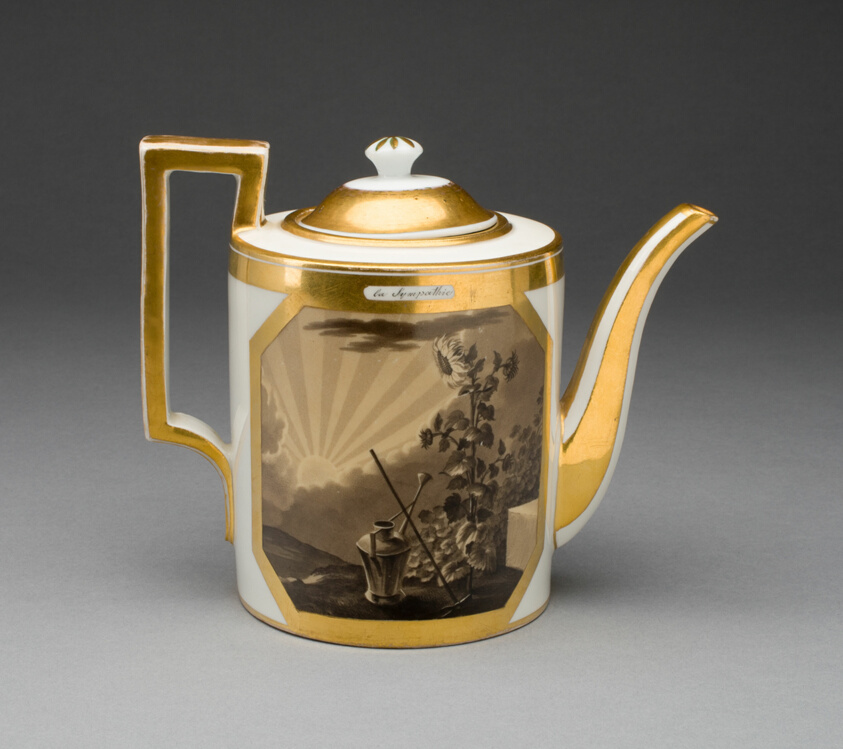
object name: Ceramics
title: Coffee Pot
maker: Vienna State Porcelain Manufactory (Austrian, 1744-1864)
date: Early 19th century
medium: Hard-paste porcelain with grisaille and gilding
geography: Vienna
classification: porcelain; ceramics; european decorative arts